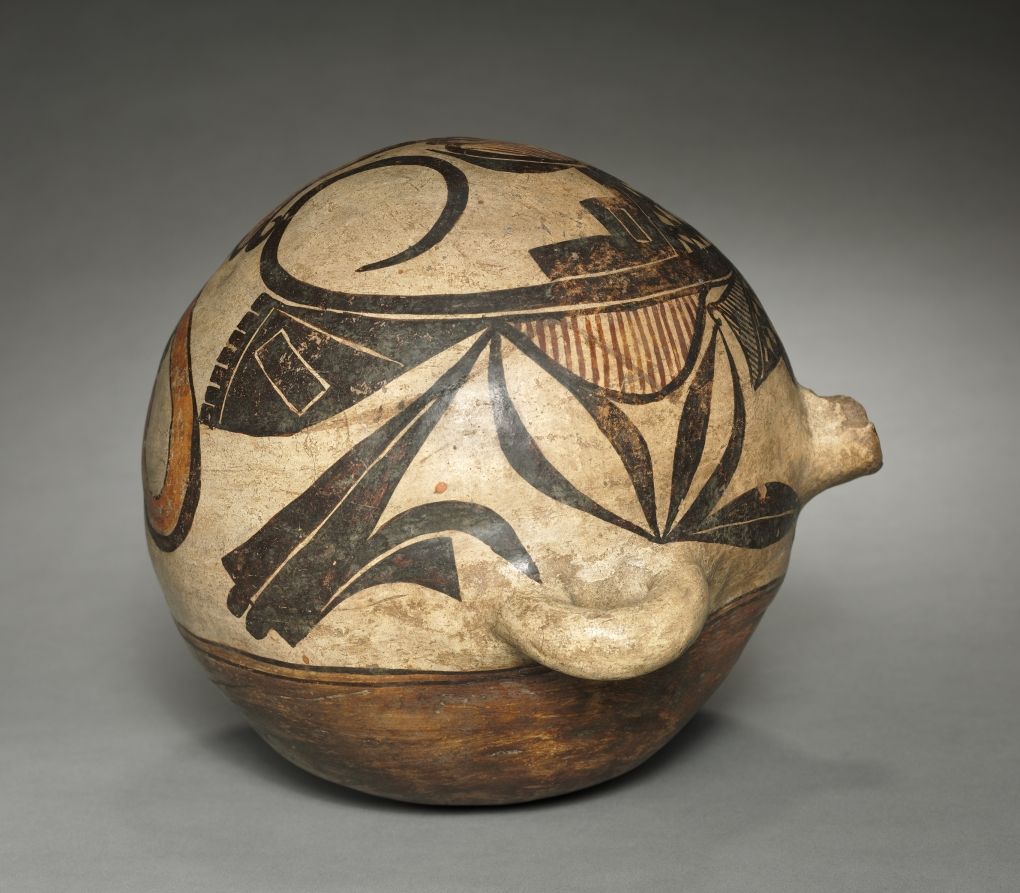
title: Canteen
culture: Native North America, Southwest, Arizona, Pueblo, Hopi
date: 1870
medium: ceramic, slip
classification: Ceramic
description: Since the 1500s, Hopi women made big-bellied canteens, based on Spanish prototypes, and used them to carry water. By the late 1800s, canteens became popular with Euro-American tourists, who increasingly flocked to the Southwest in search of encounters with “exotic” Native American cultures. Thus, Hopi artists embellished their wares to improve their appeal, here with graceful abstract forms.